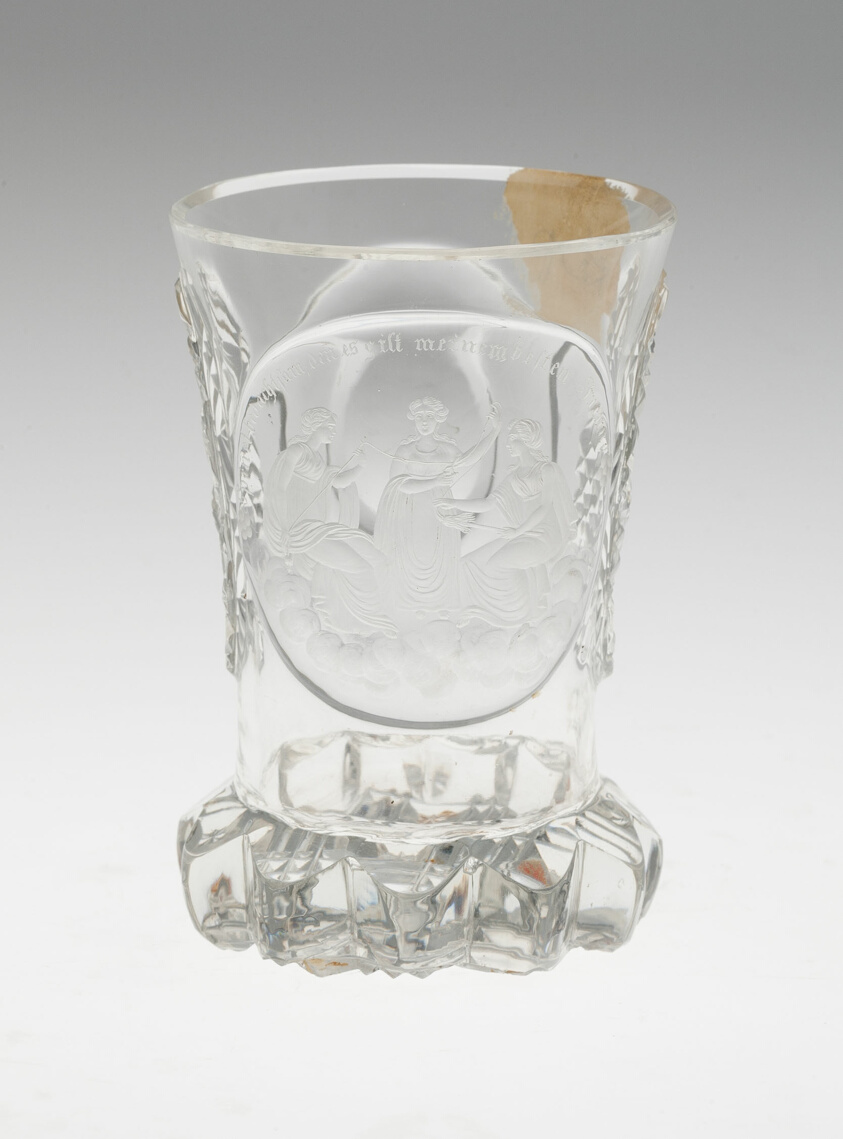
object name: Glass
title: Beaker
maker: Bohemia, Czech Republic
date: c. 1820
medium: Glass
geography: Bohemia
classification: drinking vessel; glass; european decorative arts